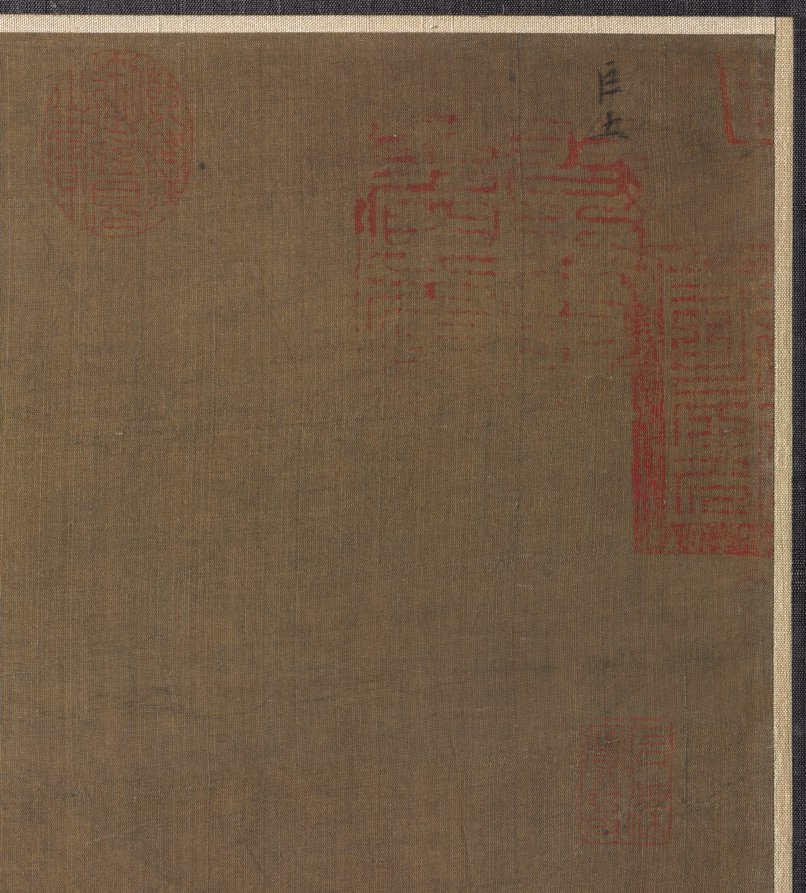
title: Buddhist Retreat by Stream and Mountains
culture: China, Northern Song dynasty (960-1127)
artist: Juran (Chinese, active 960–985)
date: 960–85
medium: Hanging scroll; ink on silk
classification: Painting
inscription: The upper portion of the scroll: the two small characters, “Ju wu 巨五”, written near the large seal. Written by a functionary in Shang Shu Sheng (the Department of State Affairs) when the painting was first received.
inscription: The upper portion of the scroll: the large seal, “Shang Shu Sheng yin 尚書省印” (seal of the Department of State Affairs)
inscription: The upper portion of the scroll: the half-seal “Si yin 司印”, seen along a border. Attributed to 典禮紀察司 of Ming dynasty.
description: Monk Juran served the Southern Tang (937–75) imperial house in Nanjing, where he studied with Dong Yuan (active 930s–60s). Both founded the southern landscape tradition, or Jiangnan school, known for gentle misty riverscapes in wet ink. Juran moved north to Kaifeng when the Southern Tang surrendered to the Northern Song, the impact of which may be seen in this painting, presumably painted after 976. A towering mountain dominates the composition, typically representing the style of the Northern Song academy; while the use of long hemp fiber strokes to texture the mountains, wet dots, and round boulders on mountain tops are elements of the southern landscape tradition.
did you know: This hanging scroll with the towering mountain is a prime example of the monumental landscape style of Northern Song.